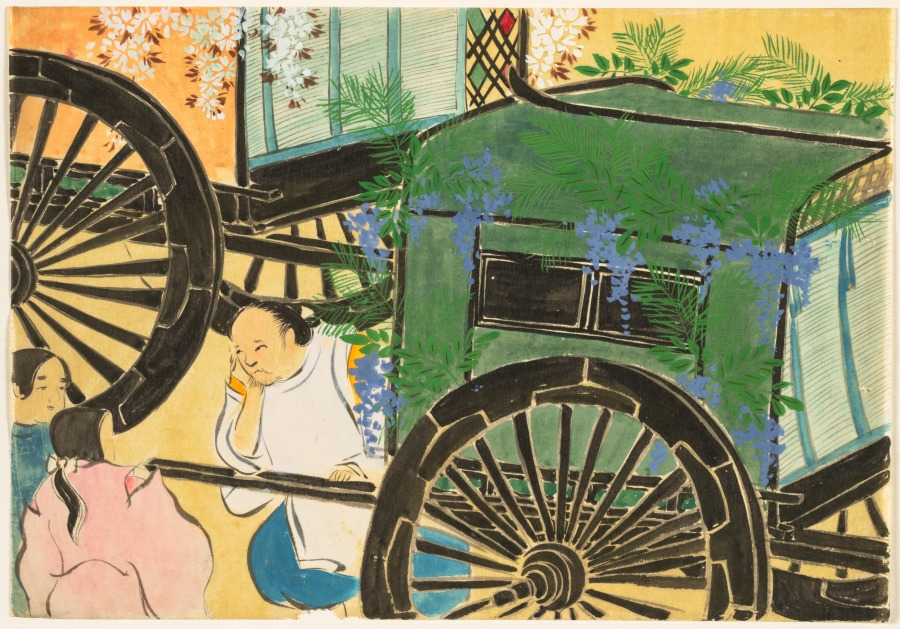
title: Flowers of a Hundred Worlds (Momoyogusa): Flower-draped Carts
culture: Japan, Meiji period (1868–1912)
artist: Kamisaka Sekka (Japanese, 1866–1942)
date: 1909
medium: ink and color on paper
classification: Drawing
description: Kamisaka Sekka made preparatory drawings for his Flowers of a Hundred Worlds series on tracing paper with ink and color. The freehand sketches are much looser than the finished, printed compositions.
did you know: This is the original drawing for a print in the second volume of the print series Flowers of a Hundred Worlds.